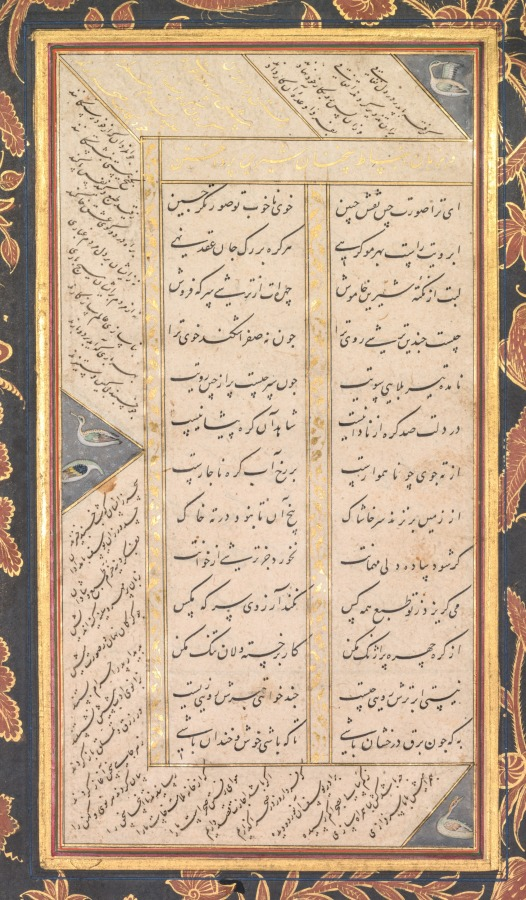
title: Folio B: Folio from the "Five Treasures" (Panj Ganj) of Jami (recto)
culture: Northern India, Mughal, early 17th century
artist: Mushfiq (Indian, active early 1600s)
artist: and others (Indian)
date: 1520–1607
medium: Gum tempera, ink, and gold on paper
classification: Painting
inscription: The miniature signed at upper left: ' amal - i Mushfiq sana 1015 (the work of the Mushfiq year 1015) Text on verso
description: This page contains two different texts, one written diagonally in the border and the other in the two central columns. The section of poetry in the border describes an episode from Joseph’s childhood in which his older brothers suggest to Jacob, their father, that they take Joseph into the countryside so that the boy can learn the area, although they actually plan to kill him. The poem in the central columns advises the reader to smile often, as a smile is sweeter and more pleasing than sugar.